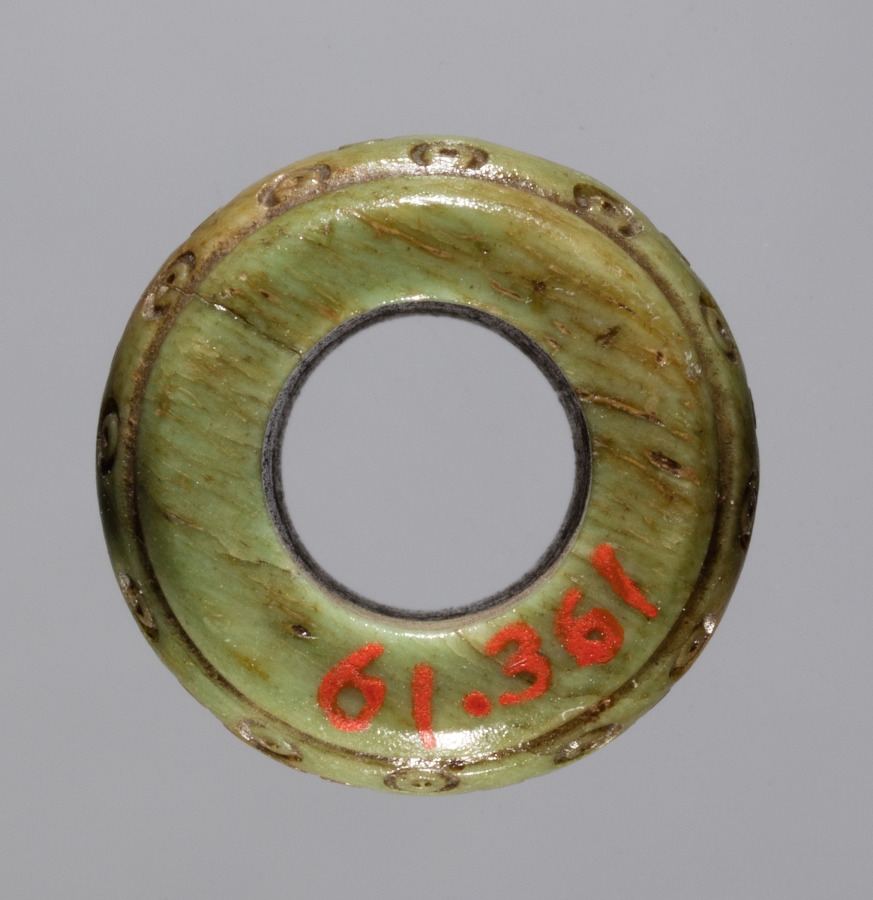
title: Spindle Whorl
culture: Iran, early Islamic period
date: 700s - 900s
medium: bone, incised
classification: Spindle Whorl